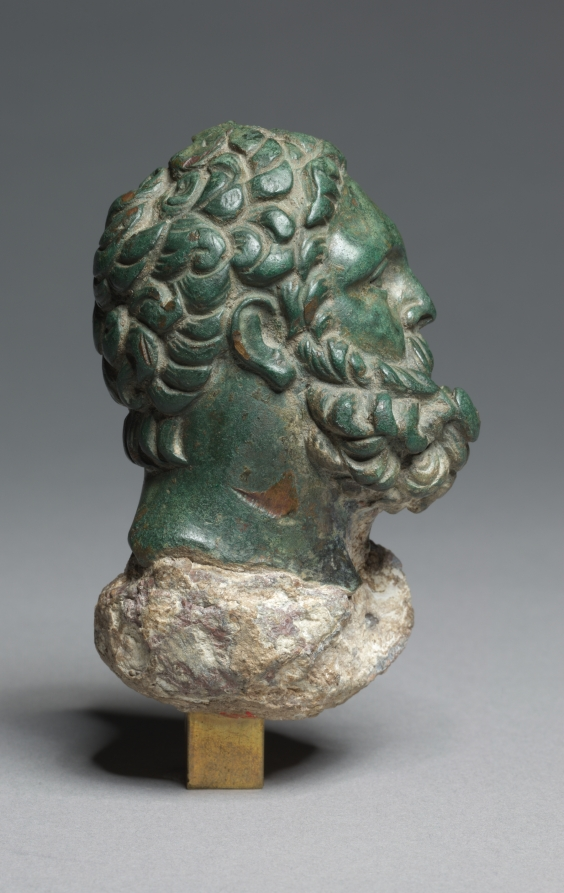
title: Head of Herakles Refashioned as a Weight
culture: Greece, Hellenistic period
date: 300–200 BCE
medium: bronze filled with lead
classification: Sculpture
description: Even without his club or lion skin, the short curly hair and full curly beard identify this miniature head as that of Herakles. The eyes and mouth were likely once inlaid. His upward gaze suggests the head may be based on the Herakles Epitrapezios by Lysippos, the personal sculptor of Alexander the Great. The original Herakles Epitrapezios survives only through copies, including this one as well as a slightly later marble version also in Cleveland (among many others). This head was refashioned into a weight, probably in the Roman period, by filling it with lead and adding holes for a hook.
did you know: Romans filled their weights with lead because it was plentiful, cheap, and easy to shape.